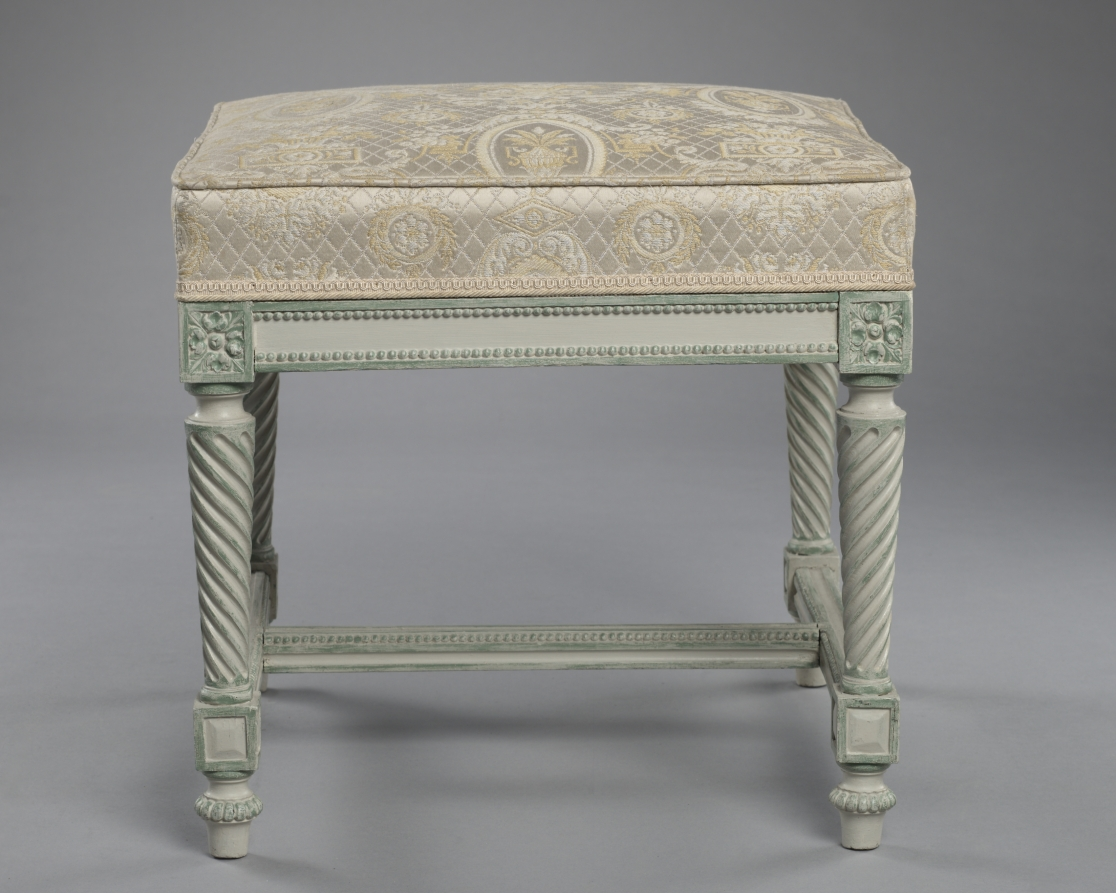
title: Stool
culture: France, Paris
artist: François-Honoré-Georges Jacob (French, 1770–1841)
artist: Georges Jacob (French, 1739–1814)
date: 1805–1813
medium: painted walnut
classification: Furniture and woodwork